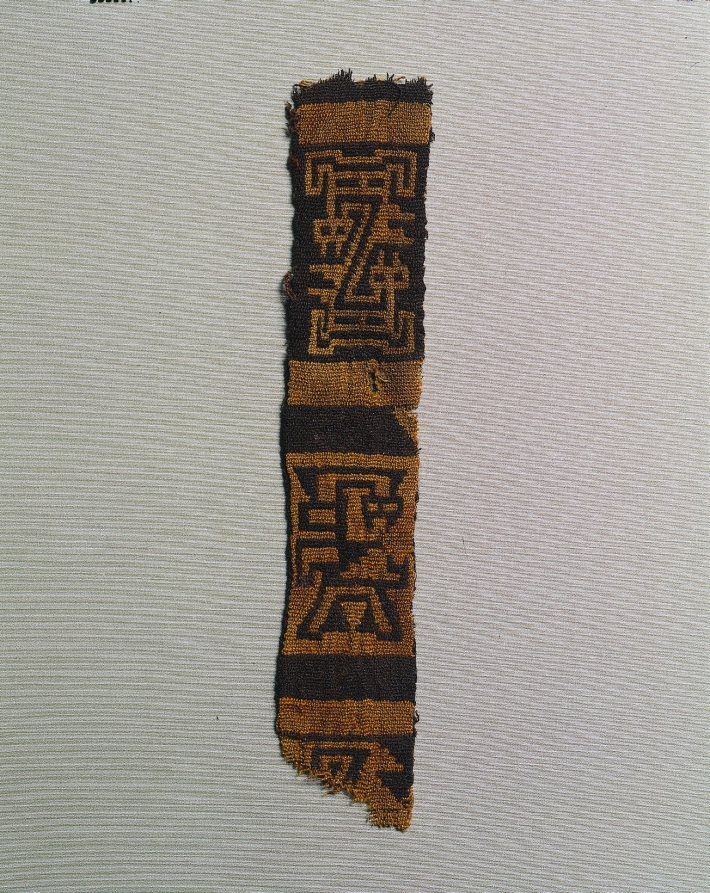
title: Double Cloth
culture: Peru, Recuay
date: 400 BCE–700 CE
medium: wool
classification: Textile